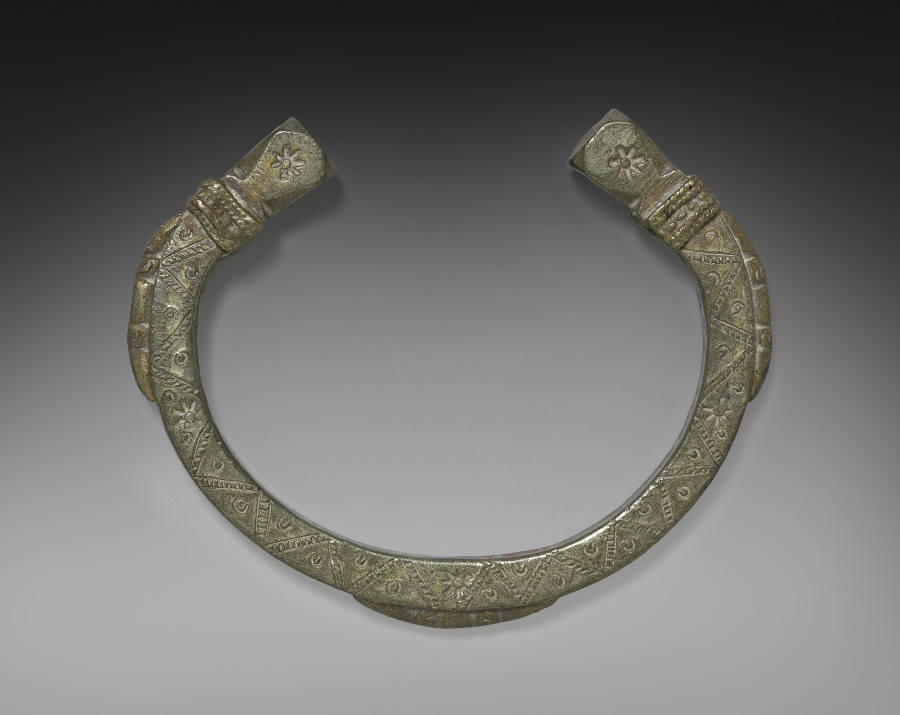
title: Anklet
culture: India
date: 1800s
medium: silver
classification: Jewelry